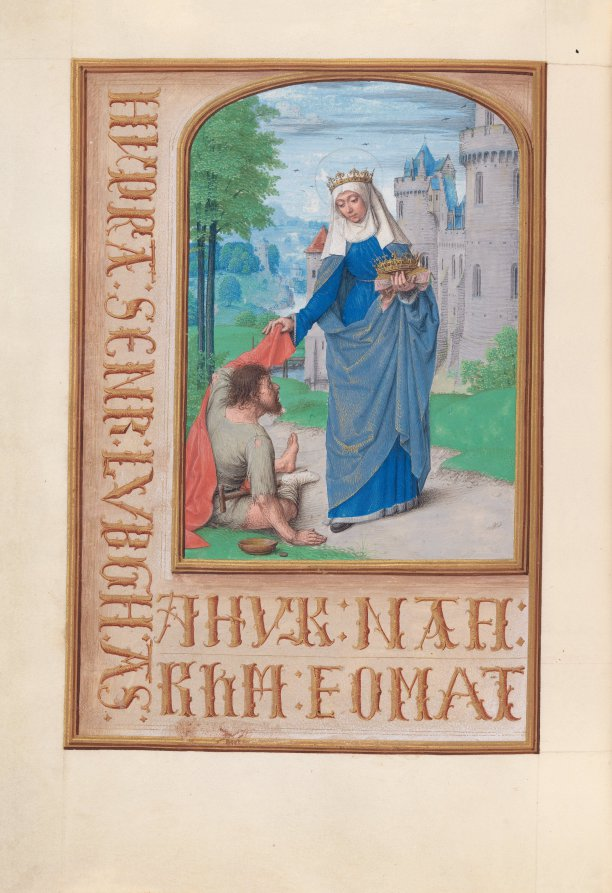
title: Hours of Queen Isabella the Catholic, Queen of Spain: Fol. 197v, St. Elizabeth of Hungary Clothing the Poor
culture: Flanders, Ghent and Bruges, late 15th century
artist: Master of the First Prayerbook of Maximillian (Flemish, c. 1444–1519)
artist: and Associates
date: c. 1500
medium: ink, tempera, and gold on vellum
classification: Bound Volume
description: This manuscript was illuminated by a circle of at least five highly organized manuscript painters active in the Flemish cities of Ghent and Bruges. The principal illuminator was Alexander Bening, who painted the majority of the book's miniatures. Manuscripts produced by this circle of artists are renowned for the decoration of their borders, which typically feature a rich variety of realistically-painted flowers, birds, and butterflies. This prayer book, called a book of hours, was intended not for a cleric, but for the private devotions of a lay person-in this case, Isabella the Catholic, Queen of Spain (1451-1504). Isabella's coat of arms embellishes the book's frontispiece. It is unlikely that the book was commissioned by the Queen herself; rather, she probably received it as a diplomatic gift from someone courting her patronage, perhaps Cardinal Francisco Jimenez de Cisneros. A Franciscan friar, Jimenez was dependent upon Isabella for his advancement, first to the post of Queen's confessor in 1492, and then to Archbishop of Toledo in 1495.